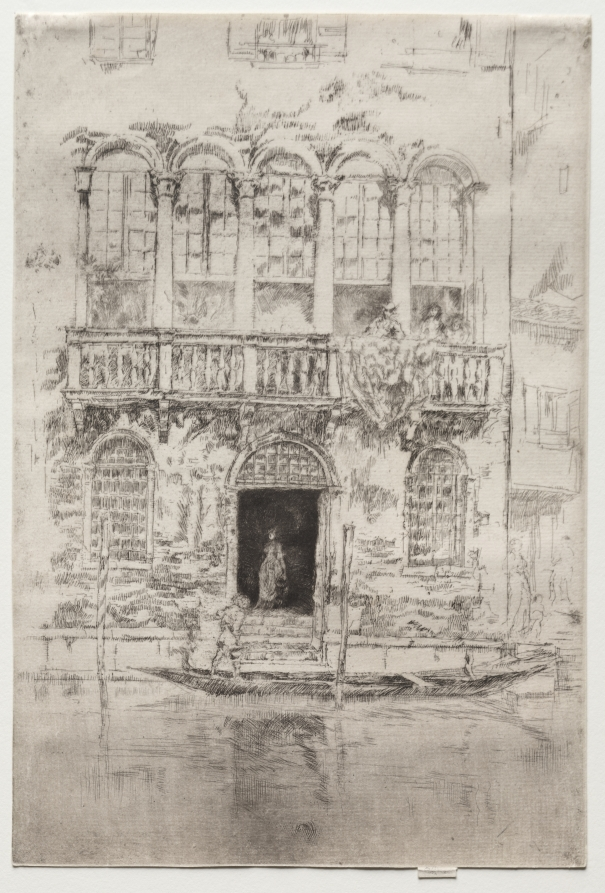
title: The Balcony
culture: America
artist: James McNeill Whistler (American, 1834–1903)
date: 1879–80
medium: etching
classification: Print